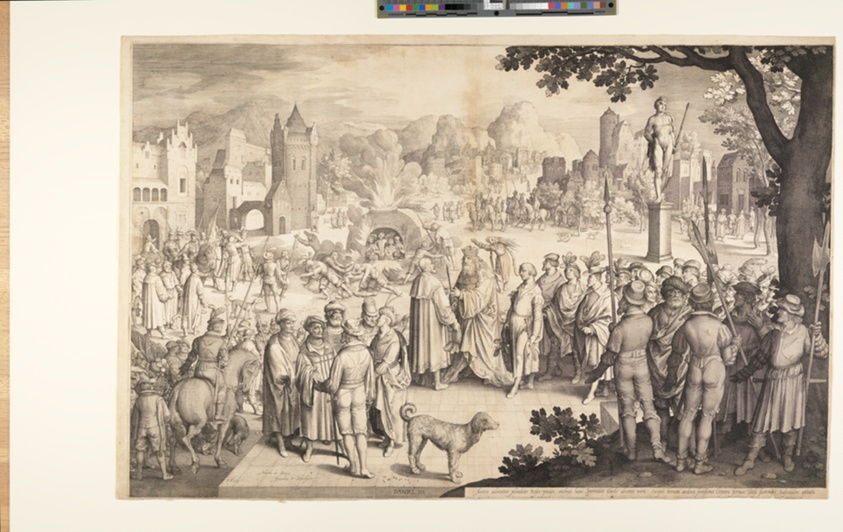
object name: Print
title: Shadrach, Meshach, and Abednego in the Burning Stove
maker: Nicolaes de Bruyn (Flemish, 1571–1656)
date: 1610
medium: Engraving on ivory laid paper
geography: Flanders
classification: engraving; paper; print; prints and drawing